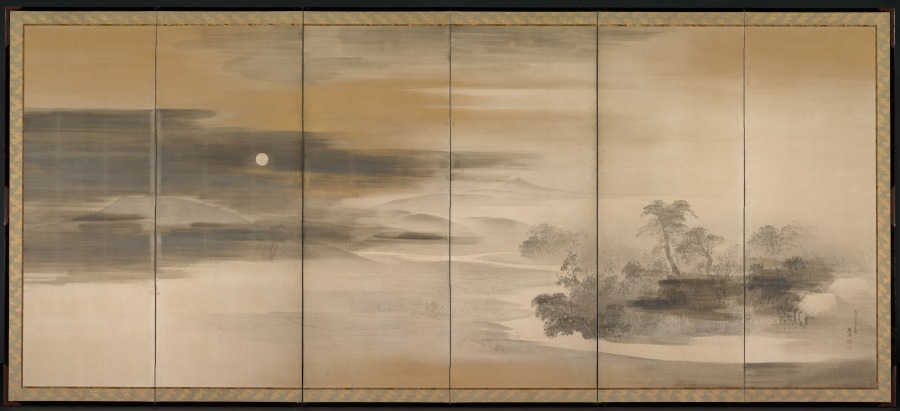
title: Summer Night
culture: Japan, Edo period (1615–1868)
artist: Maruyama Ōkyo (Japanese, 1733–1795)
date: 1784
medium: Six-panel folding screen, ink, gold, and silver on paper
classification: Painting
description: Ōkyo painted these panoramas in the summer of 1784. Regarded as Kyoto's most important painting teacher and accomplished artist, he had studied Western painting techniques, "realistic" sketching from nature, and traditional Japanese style painting (yamato-e). The naturalistic quality of these scenes results from a blend of detailed observation of nature and a remote, even detached regard for man's place in the world.